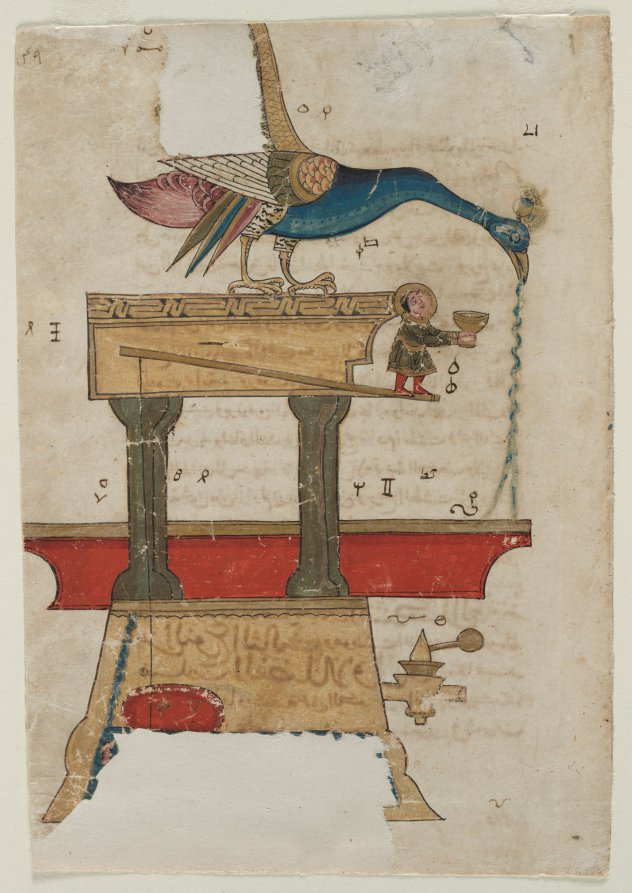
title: Peacock-shaped Hand Washing Device: Illustration from The Book of Knowledge of Ingenious Mechanical Devices (Automata) of Ibn al-Razza al-Jazari (recto)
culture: Syria, Damascus, Mamluk Period, 14th Century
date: 1315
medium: opaque watercolor and gold on paper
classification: Manuscript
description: This leaf from a 1315 Syrian copy of Ibn al-Razzāz al-Jazarī’s The Book of Knowledge of Ingenious Mechanical Devices, written in 1206, depicts a peacock basin automaton for ritual hand washing. There are 15 surviving manuscript copies of al-Jazarī’s work, ranging from the early 13th to the late 19th century. An engineer from upper Mesopotamia, al-Jazarī was in the service of King Nasrī al-Dīn when he completed his masterwork, an anthology of automated devices including clocks, trick vessels for drinking sessions, devices for washing, fountains, water-raising machines, and measuring instruments. His designs clearly illustrate that automata were not innovations from Western Europe, but they stemmed from a tradition known in the ancient, Islamic, and Byzantine worlds. We do not know with certainty that al-Jazarī’s device was ever actually constructed.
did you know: The mouth of the peacock acts as a spigot pouring water; the figure emerged from a small door and offers soap to the hand washer.